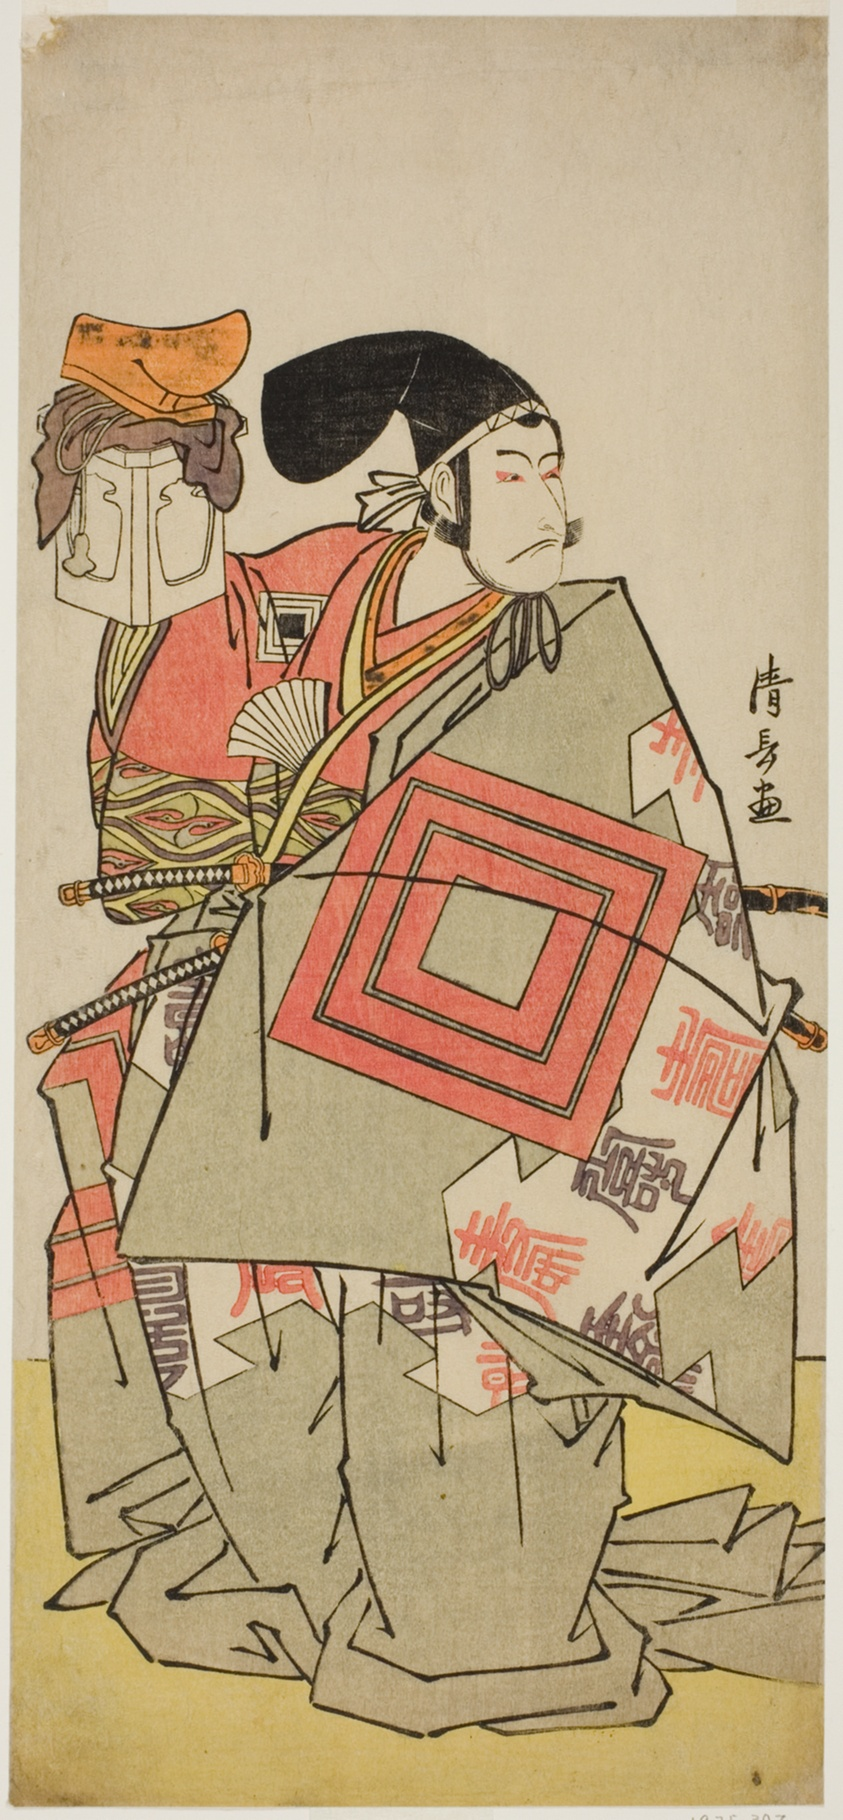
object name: Print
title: The Actor Ichikawa Danjuro V as Minamoto no Yoshiie, in the play "Date Nishiki Tsui no Yumitori," performed at the Morita Theater in the eleventh month, 1778 (?)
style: Japanese (culture or style)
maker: Torii Kiyonaga (Japanese, 1752-1815)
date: 1778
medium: Color woodblock print; hosoban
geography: Japan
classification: woodblock print; print; asian art